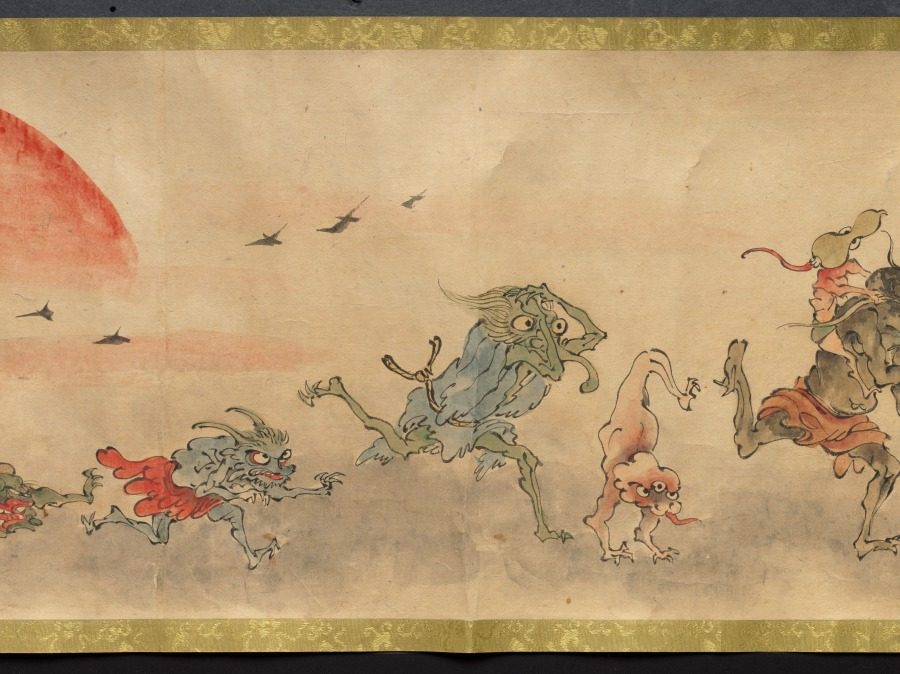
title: An Illustrated Marriage of Apparitions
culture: Japan, Edo period (1615–1868)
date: mid-1800s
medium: handscroll; ink and color on paper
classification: Painting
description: The matchmaking, engagement, wedding, and birth of the first child of two apparitions, or bakemono, literally "things that change," are illustrated in this whimsical, humorous handscroll. Japanese folklore abounds with such strange creatures, most famously represented in handscrolls featuring a procession of 100 supernatural monsters. Aside from a textual preface and cartouches indicating the content of the scenes, the tale is told visually. The artist and whereabouts of the original handscroll are unknown, but a number of other 19th-century copies by amateur painters exist in Japanese collections, attesting to its broad appeal.